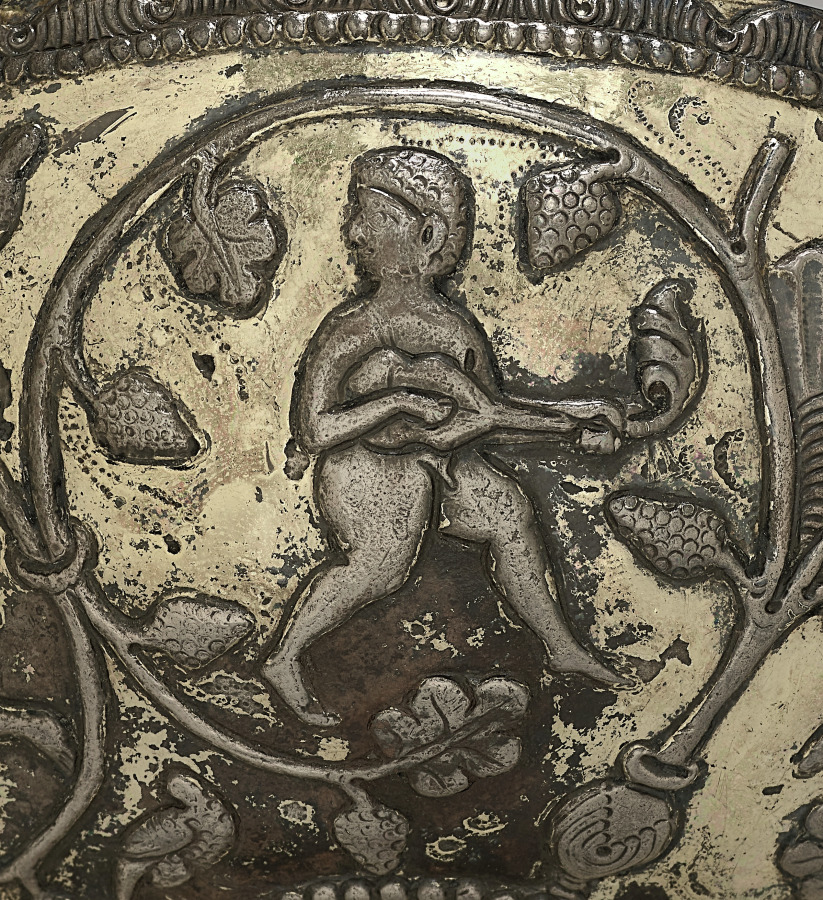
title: Bowl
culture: Iran, Sasanian Empire (224–651 CE)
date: 500–700 CE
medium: silver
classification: Metalwork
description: Every good Zoroastrian was supposed to spend one-third of his day farming; one-third philosophizing; and one-third eating, resting, and at pleasure. The abundance of Sasanian luxury goods is evidence of the importance accorded the last third of the day.